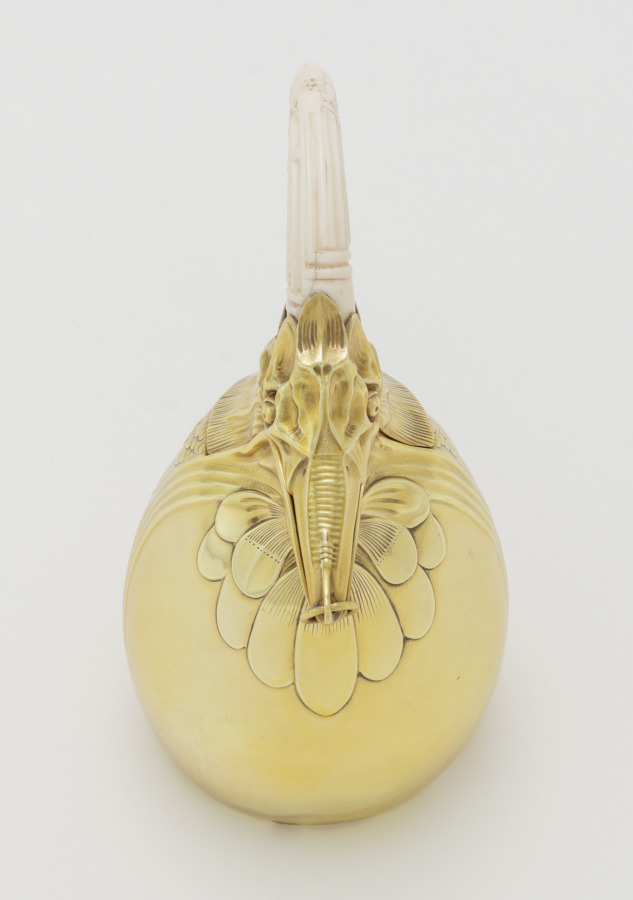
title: Coffee Pot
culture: France, Paris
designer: Carlo Bugatti (Italian, 1856–1940)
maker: Adrien-Aurélien Hebrard (French, 1866–1937)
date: c. 1907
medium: Gilt silver and ivory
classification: Silver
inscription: Made by A. A. Hebrard Firm, Paris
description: This tea and coffee service, salver, and table, together with some now missing cups, were all designed by Carlo Bugatti as an ensemble and presented at the 1902 exposition devoted to decorative arts in Turin, Italy. The set was probably acquired from Bugatti's 1907 exhibition at the Galerie Hébrard in Paris by a wealthy South African widow, Anna Blake, who was living there at the time. Some of the animal and insect motifs suggest mythical beasts or the fossils of prehistoric animals. When Mrs. Blake returned to Cape Town, she took these and other pieces designed by Bugatti with her, and they remained in South Africa throughout her lifetime.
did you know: This coffee pot is part of a larger tea and coffee service designed by Carlo Bugatti.